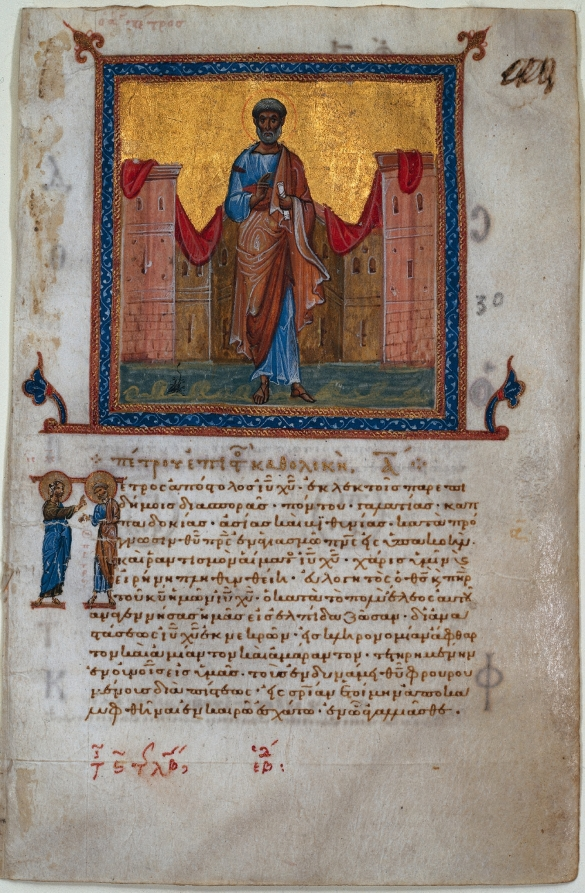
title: Leaf from a Greek Psalter and New Testament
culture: Byzantium, Constantinople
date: 1084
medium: ink, tempera, and gold on vellum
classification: Manuscript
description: Covering half the page of this leaf is a miniature representing the Apostle Peter. Below are 13 lines of Greek text introduced by the Greek letter pi which is created by figures of Christ and Saint Peter. The leaf comes from a combined psalter (book of sacred songs) and the New Testament. In its design, it shows close parallels with examples that were created in Constantinople workshops.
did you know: Imported illuminated manuscripts were important in spreading the Byzantine style throughout Western Europe.